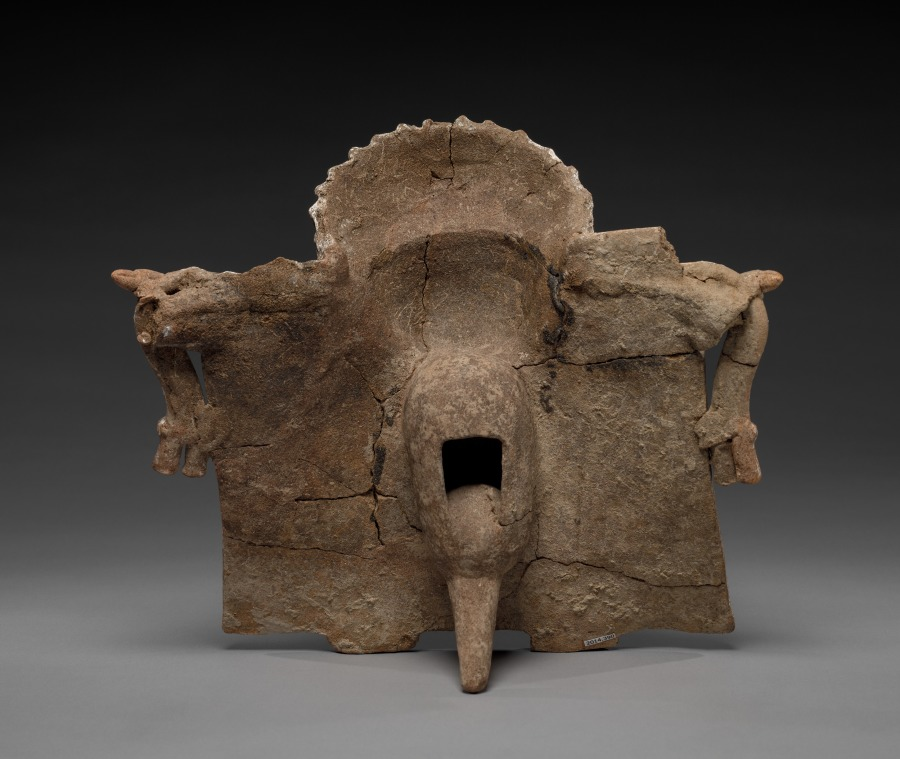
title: Standing Female Figure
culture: Mesoamerica, Veracruz, Nopiloa style?, 7th-10th century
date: 600–1000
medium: ceramic, pigment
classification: Sculpture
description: Ancient Veracruz artists used ceramic to create figural sculptures in a range of sizes, styles, and types. This beautiful, finely wrought female figure is an exceptional example. Although her identity is unknown, her adornments signal high status: ear ornaments, a large necklace, an elaborate dress that drapes over her outstretched arms, and perhaps even her front teeth, filed into a T shape, may have symbolic importance. The unfinished back, with a tripod support, suggests that the figure was meant to be seen from the front.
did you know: This lovely female’s body is a flat plaque supported by a tripod at the rear.